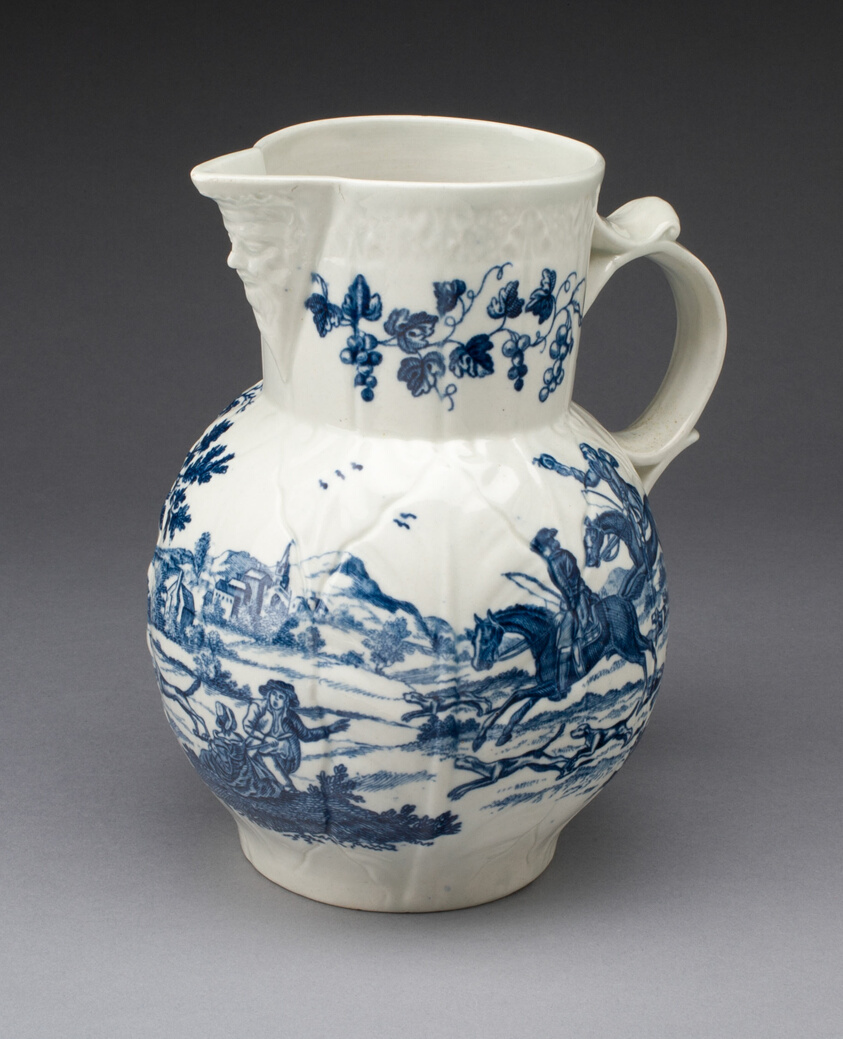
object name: Ceramics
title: Jug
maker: Worcester Porcelain Factory (Warmstry House Period, 1751–1783); Worcester, England, founded 1751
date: 1775/80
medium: Soft-paste porcelain, underglaze blue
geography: Worcester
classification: porcelain; european decorative arts; ceramics